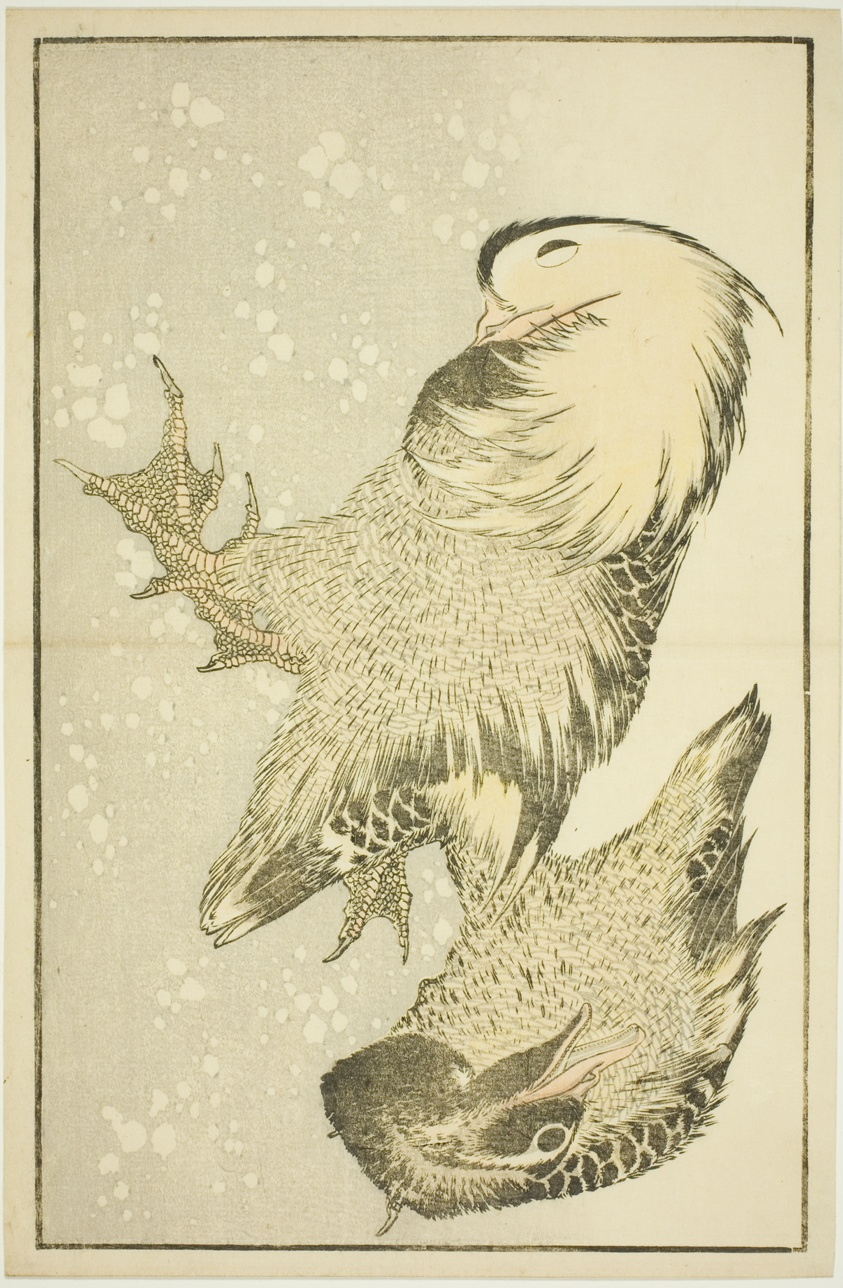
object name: Print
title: Two Waterfowl, from The Picture Book of Realistic Paintings of Hokusai (Hokusai shashin gafu)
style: Japanese (culture or style)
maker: Katsushika Hokusai 葛飾 北斎; Japanese, 1760-1849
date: c. 1814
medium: Color woodblock print (album sheet)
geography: Japan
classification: woodblock print; print; asian art